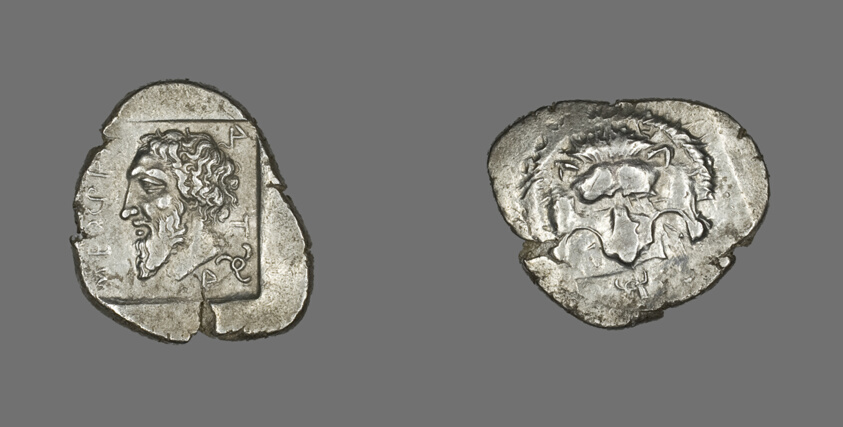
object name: Coin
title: Stater (Coin) Portraying Mithrapata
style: greek, ancient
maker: Greek; Lycia, Asia Minor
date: 380-375 BCE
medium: Silver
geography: Anatolia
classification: coin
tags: portraits